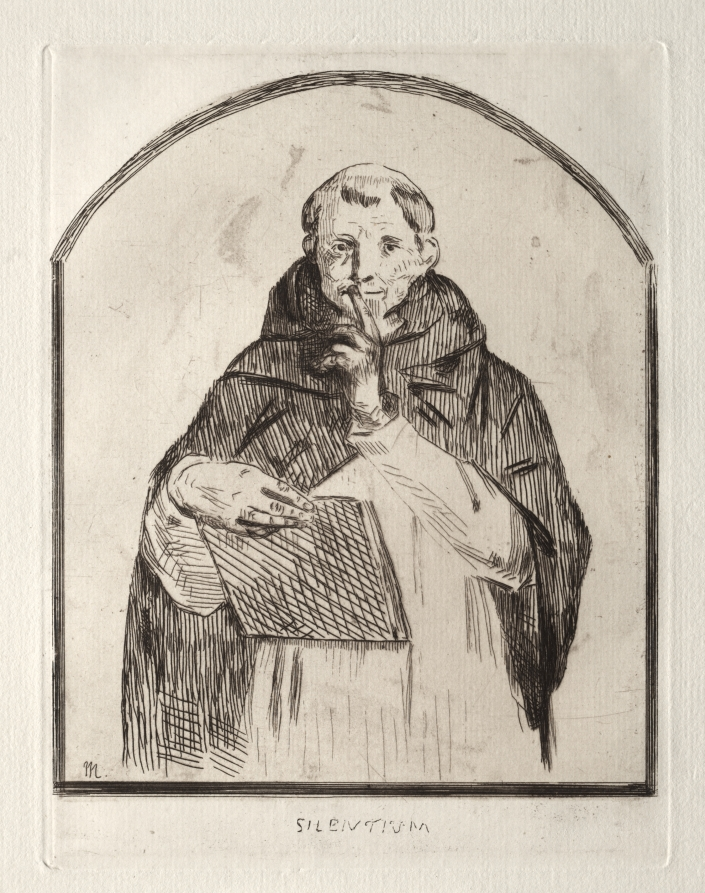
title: Silentium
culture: France, 19th century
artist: Édouard Manet (French, 1832–1883)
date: 1860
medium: etching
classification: Print